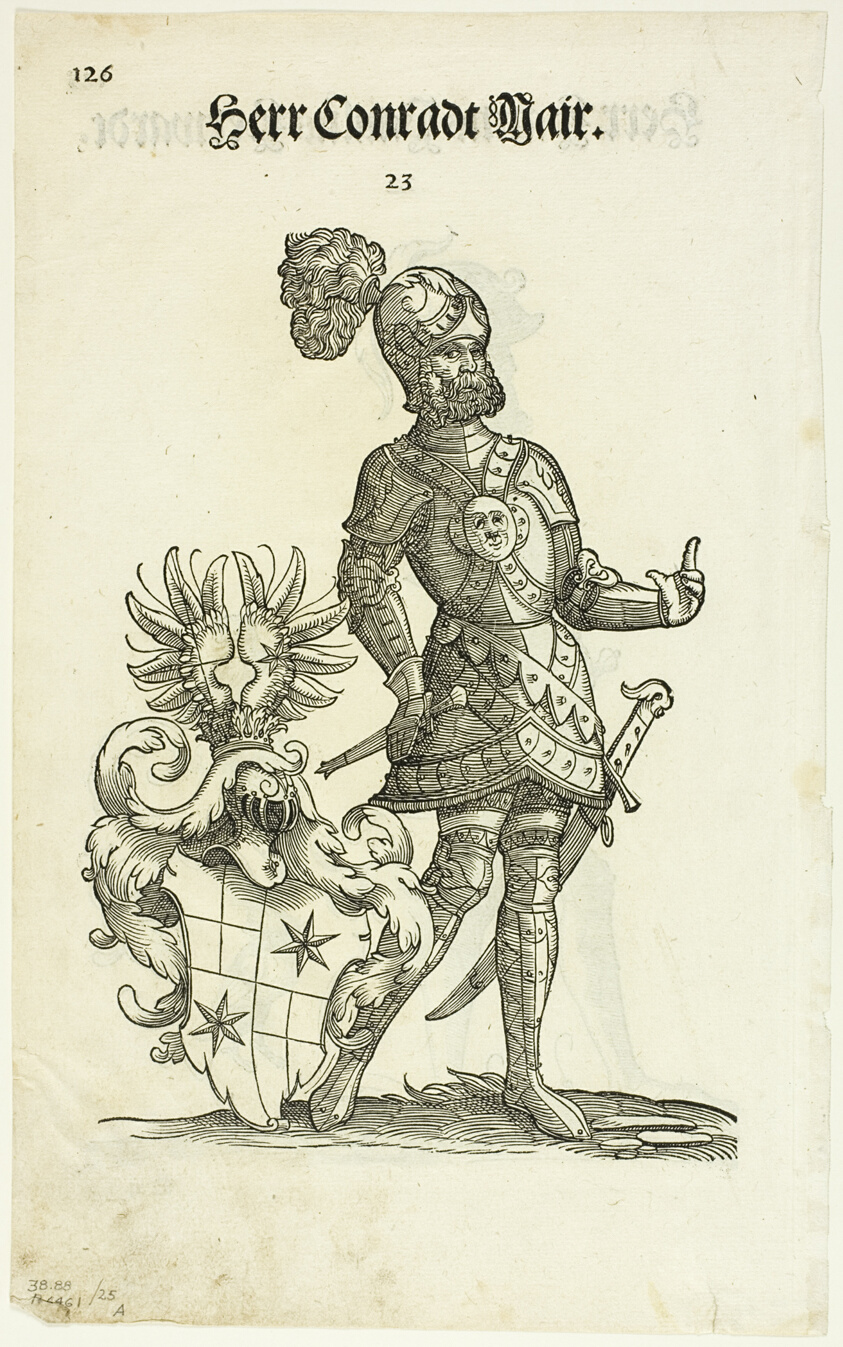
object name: Print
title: Herr Conradt Mair (recto) and Herr Hanns Paulus Herwardt (verso) from Augsburger Geschlechter Buch, plate 25 from Woodcuts from Books of the XVI Century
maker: Christoph Weiditz, I (German, 1500-1559); assembled by Max Geisberg (Swiss, 1875-1943)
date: 1550, assembled into portfolio 1937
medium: Woodcut on paper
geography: Germany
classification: woodcut; print; prints and drawing